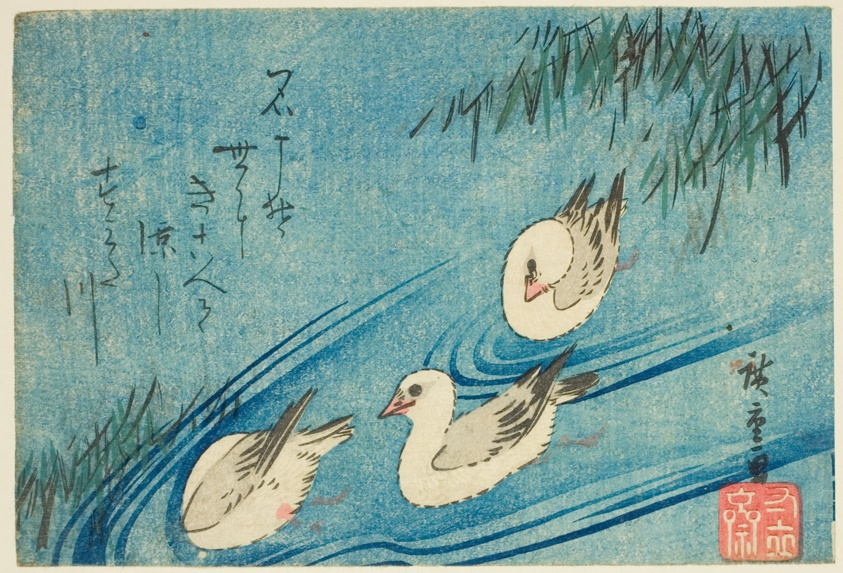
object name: Print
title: Oystercatchers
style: Japanese (culture or style)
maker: Utagawa Hiroshige 歌川 広重; Japanese, 1797-1858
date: c. 1833/34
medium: Color woodblock print; koban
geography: Japan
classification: woodblock print; print; asian art